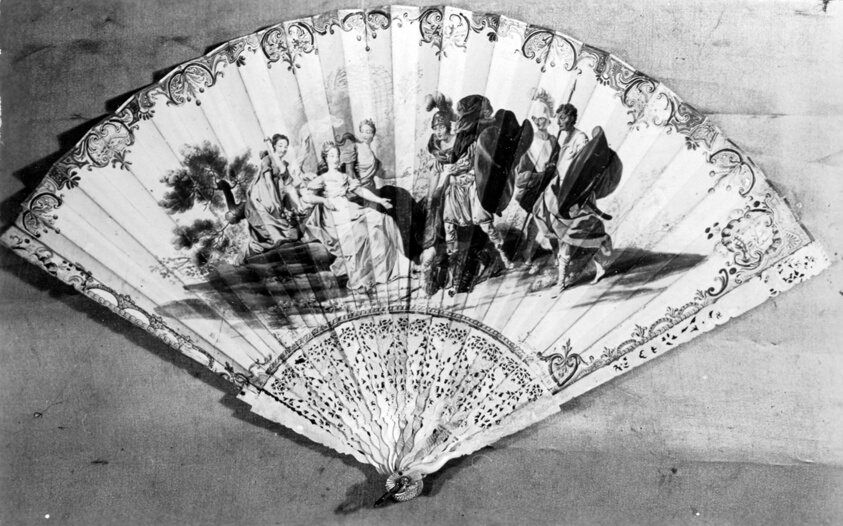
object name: Costume and Accessories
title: Fan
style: louis xvi, european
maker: France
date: 18th century, Louis XVI period (1774–1793)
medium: Carved pearl sticks; painted paper mount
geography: France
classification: textile; fan - paper; costume accessory - folding fan; costume